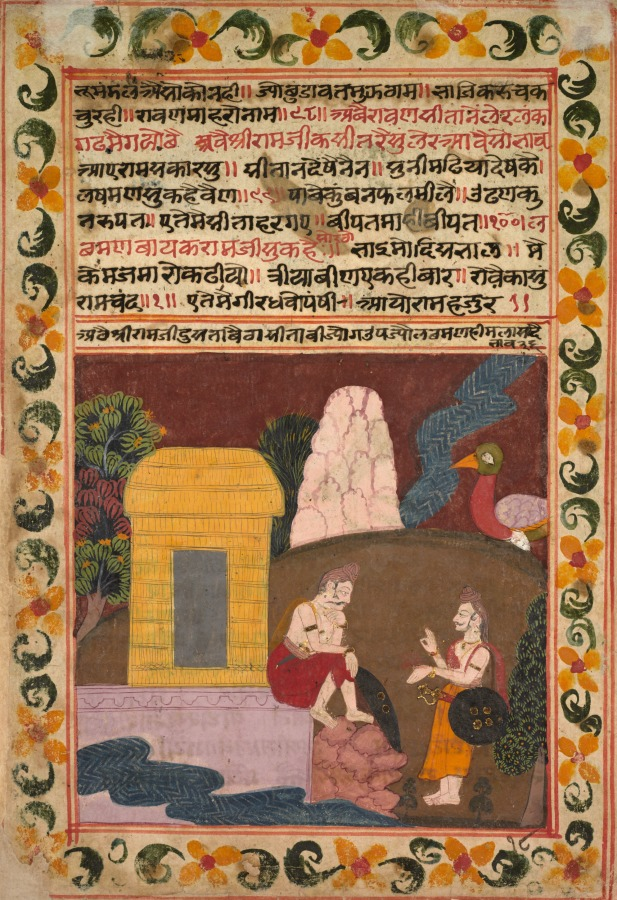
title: Folio 18 from a Chandana Malayagiri Varta (Story of King Chandana and Queen Malayagiri) of Karamachand: Ravana battles the great vulture Jatayu and defeats him by throwing stones in his mouth (recto); Jatayu approaches Rama and Lakshmana who are wondering where Sita could be (verso)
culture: Northwestern India, Rajasthan, Rajput Kingdom of Kishangarh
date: 1744–45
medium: Gum tempera, ink, and gold on paper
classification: Painting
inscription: [[recto, caption above image]] aṭhai gīradhavo paṁkhī rāvaṇa suṁ judha karai paṁkhī hāryo pathara muha mai nākhyā / bhāva 35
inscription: [[recto, text below image]] rāvaṇa kai geha || nayaṇā āsu jhaḍa lagyau || jāṇika barasata meha / ||92|| gīradhavo paṁkhī śrī rāma ko || sītā cokīdāra || cugaṇa / gayo tīṇa avasarai || pāchai harī ja nāra ||93|| rāvaṇa līyā jā / ta hai || sītā karī pukāra || paṁkhī pākha pasāra ke || paḍyo ja rāvaṇa / lāra ||94|| cāca mārata saba deha mai || jaisai barachī pāra || laḍata / laḍata rāvaṇa ḍaryo || khuba pohocāï māra ||95|| pathara lo / hī rāvaṇa raṁgai || ḍārata mukha mai khāta || pāthara su bhārī huvo / jaba rāvaṇa le jāta ||96|| le sītā laṁkā gaye || rākasa / bhae ūdāsa || rāvaṇa kuṁ aisai kahai || gayo ja laṁkā bāsa ||9 / 7|| rāvaṇa vāyakaḥ || rākasā su kahai joma kī bāta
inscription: [[verso, caption above image]] aṭhai śrī rāmajī dusatā baiṭhā sītā bījyoga ūpajyau lachamaṇa hī malāsa dai / bhāva 36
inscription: [[verso, text above image and caption]] bhūmaṁḍala aiso ko nahī || jyo chuḍāvata mujha ṭhāma || bhāji karu caka / cura hī || rāvaṇa māharo nāma ||98|| abai rāvaṇa sītā ne lera laṁka / gaḍha mai gayo chai avai śrī rāmajī ka sīta rai suṁ lera āvai so bhāva / āe rāma sakāra su || sītā na deṁkhai naina || sunī maḍhiyā dekha kai | / lakhamaṇa su kahai vaiṇa ||99|| pābe kuṁ banaphala mīlaiṁ || ūḍhaṇa ku / tarupata || ete mai sītā hara gae || bīpata māhībīpata ||100| la / chamaṇa bāyaka rāmajī su kahaiḥ || soraṭho bhāi mo disa bhāla || mai / kema ja māro kaḍhiyo || trīyā bīṇa eka hī bāra || rovai kāsuṁ / rāmacaṁda ||1|| ete mai gīradhavo paṁkhī || āyo rāma hajura ||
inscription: [[verso, lower right corner]] 18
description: Scenes pertaining to the loss and rescue of Sita have been embedded in a popular tale written by Bhadrasena (active c. 1620), and expanded by the poet Karamacand in 1629–30. The pages from this manuscript are dispersed among many collections. Its last page, known from a photograph provided by Arun Bharany in New Delhi, includes a colophon statement. It informs us that the manuscript was written in Samvat 1802 (equivalent to 1744–45) in Kishangarh for five patrons named Rikhaji, Karamchandji, Mahataji, Shri Jagamalaji, and his son Motichandji. The scribe was a monk named Udayasagar in the Bijai (or Vijay) Gacch, a monastic lineage of the Shvetambar Jains.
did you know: Reciting, hearing, and meditating on this story was thought to bring merit for ten million eons (a crore of kalpas).